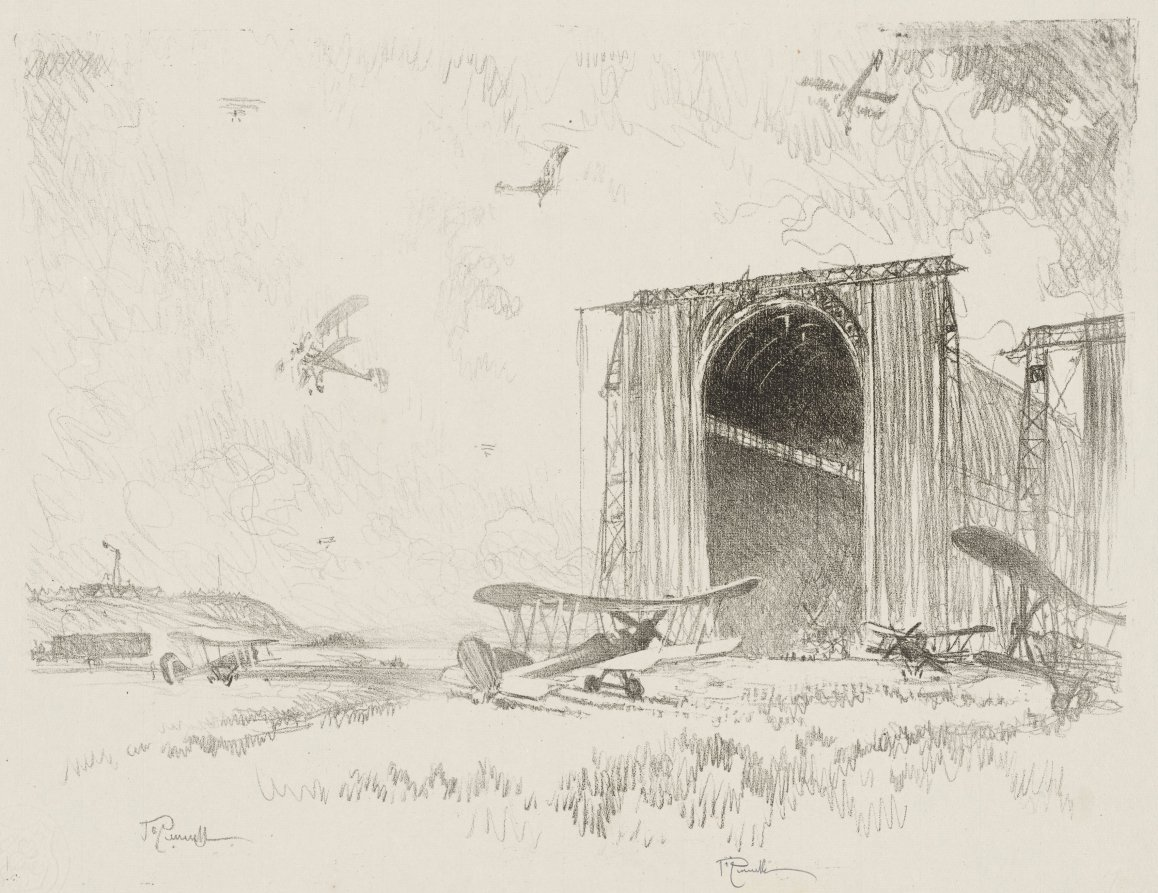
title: English War Work: The Balloon-Shed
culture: America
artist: Joseph Pennell (American, 1857–1926)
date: 1916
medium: lithograph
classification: Print